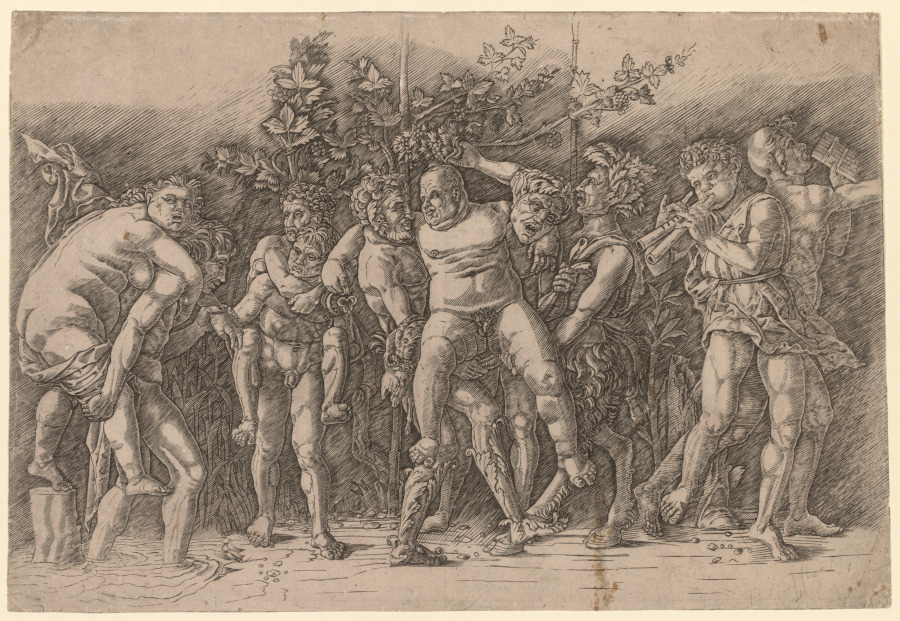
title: Bacchanal with Silenus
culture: Italy, 15th century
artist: Giovanni Antonio da Brescia (Italian)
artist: after Andrea Mantegna (Italian, about 1431–1506)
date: late 1400s–early 1500s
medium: engraving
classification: Print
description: Perhaps unhappy with the way his engraved plates had worn down from use, Andrea Mantegna commissioned Giovanni Antonio da Brescia to reengrave several of his compositions. Comparing Da Brescia’s impression to Mantegna’s shows that the copperplate was less worn when the later print was made and the inks more expertly mixed to adhere to the incised lines, resulting in an overall stronger impression with greater contrast. The impact is a work that has a strong affinity with the relief-carved Roman sarcophagi (stone coffins) that inspired Mantegna.